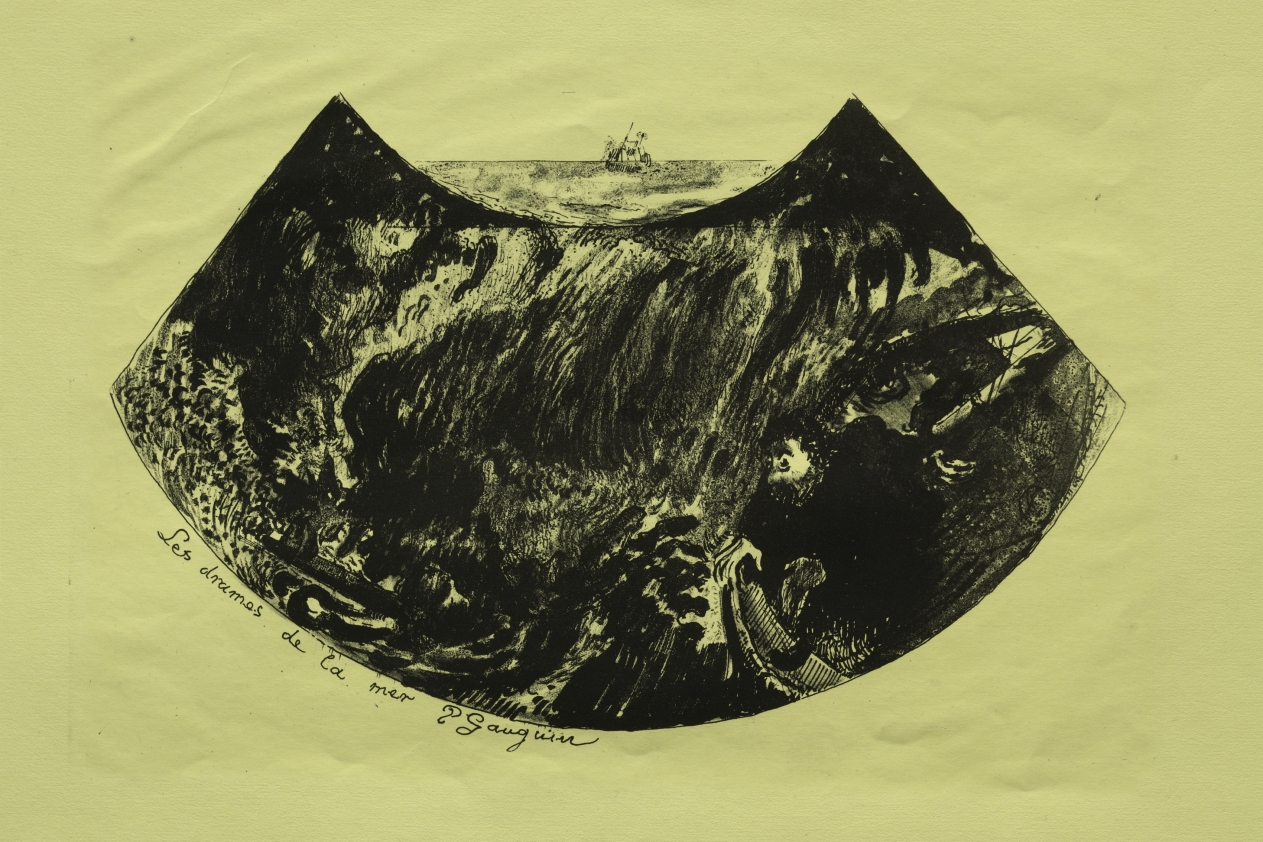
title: Volpini Suite: Dramas of the Sea (Les Drames de la Mer)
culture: France, 19th century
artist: Paul Gauguin (French, 1848–1903)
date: 1889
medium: zincograph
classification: Print